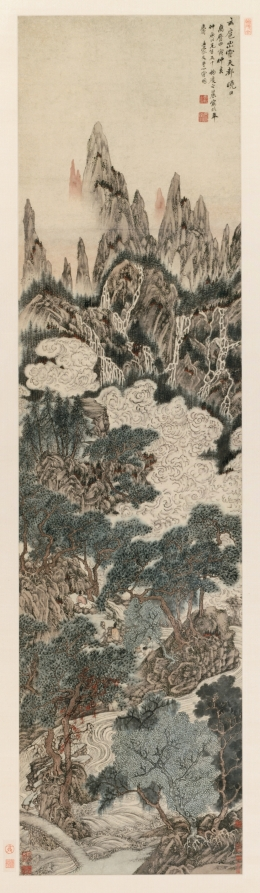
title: Morning Sun over Heavenly Citadel Peak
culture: China, Ming dynasty (1368–1644)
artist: Ding Yunpeng (Chinese, 1547-c. 1628)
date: 1614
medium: Hanging scroll; ink and light color on paper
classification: Painting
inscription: Artist's inscription, signature, and 2 seals: Clouds arise from the dale of the "Dark Plateau," The morning sun is over the peak of the Heavenly Citadel. In mid-spring of the chia-yen year of the Wan-li era [1614], painted as a fiftieth birthday present to Mr. Chung-lu. Junior Friend of Family Alliance, Ting Yün-p'eng [seals] Yün-p'eng chih yin; Ting Nan-yü.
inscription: 10 additional seals: 5 of Kao Hsiang-ling (dates unknown); 5 unidentified.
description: A birthday gift, this scroll by Ding Yunpeng from Anhui is among the earliest paintings of Mount Huang (Yellow Mountains), here depicting Heavenly Citadel Peak. The mountains are named after the legendary Yellow emperor who is said to have visited the place to look for the essence of immortality. Deep red strokes accentuate vegetation and allude to cinnabar, the alleged elixir of immortality. Difficult to climb and access, Mount Huang in Anhui province did not become a destination for hikers nor a subject for artists before the late Ming dynasty, when steps were built. Today its towering peaks are a national site and tourist attraction.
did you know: Mount Huang, known for its scenic beauty, is one of China's major tourist attractions.